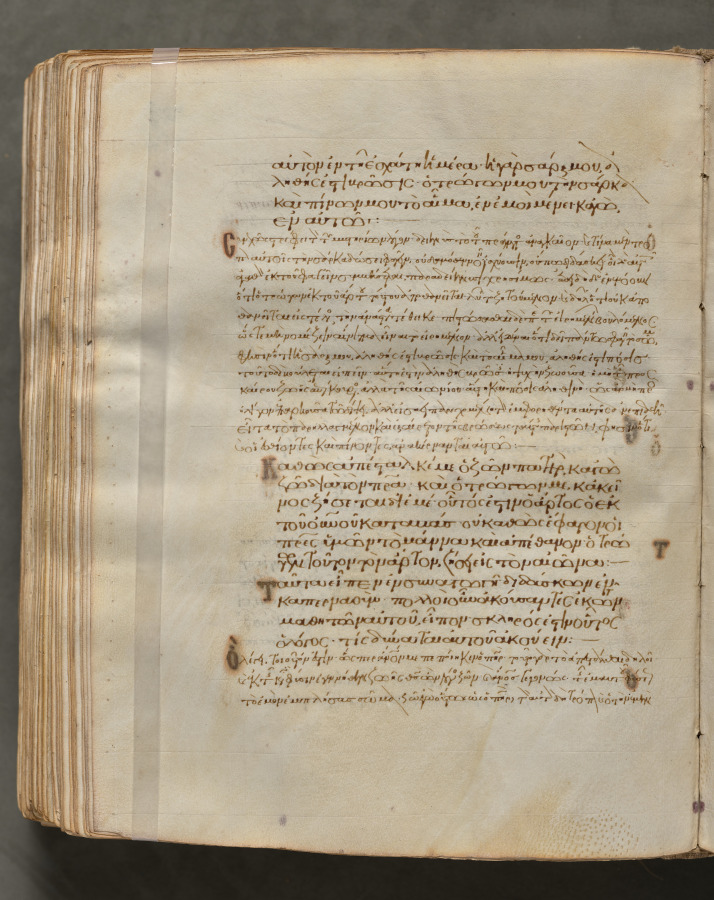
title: Text, folio 354 (verso), from a Gospel Book with Commentaries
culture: Byzantium, Constantinople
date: c. 1000–1100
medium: ink, tempera, and gold on vellum; leather binding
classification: Bound Volume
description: Each of the four gospels in this book opens on a page with brilliantly illuminated borders depicting the author of the text as well as birds—principally peacocks, symbols of the immortality of the soul—and fountains, representing the fountain of life and the salvation of the soul. This volume consists of 428 leaves with texts in Greek. Its level of sophistication suggests that it was probably written and decorated in a monastery in Constantinople.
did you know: Gospel books were carried in procession through Byzantine churches.